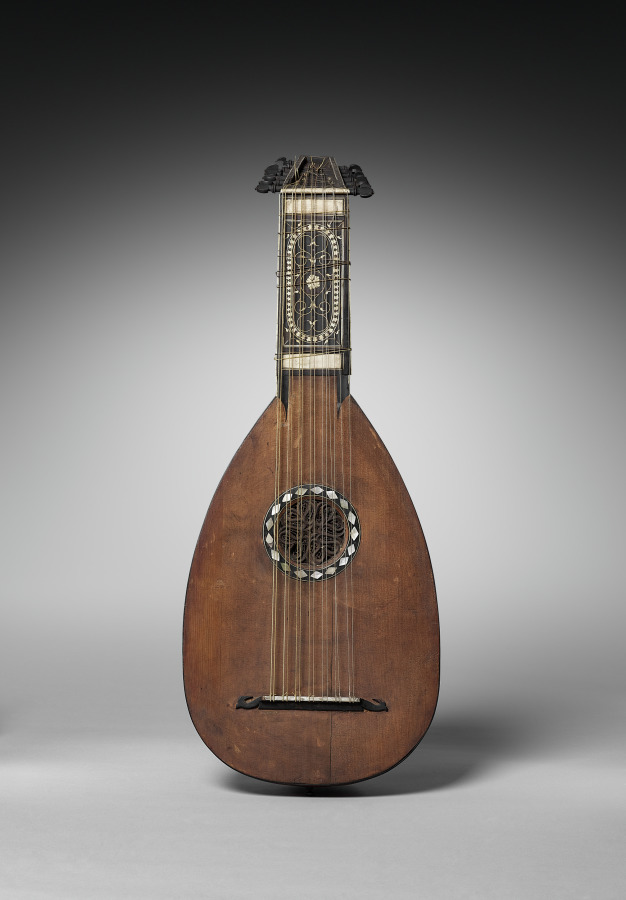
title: Lute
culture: Italy, Venice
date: c. 1550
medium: wood, laminated parchment?, sound hole, bone, ebonized wood, and mother of pearl inlay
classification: Musical Instrument